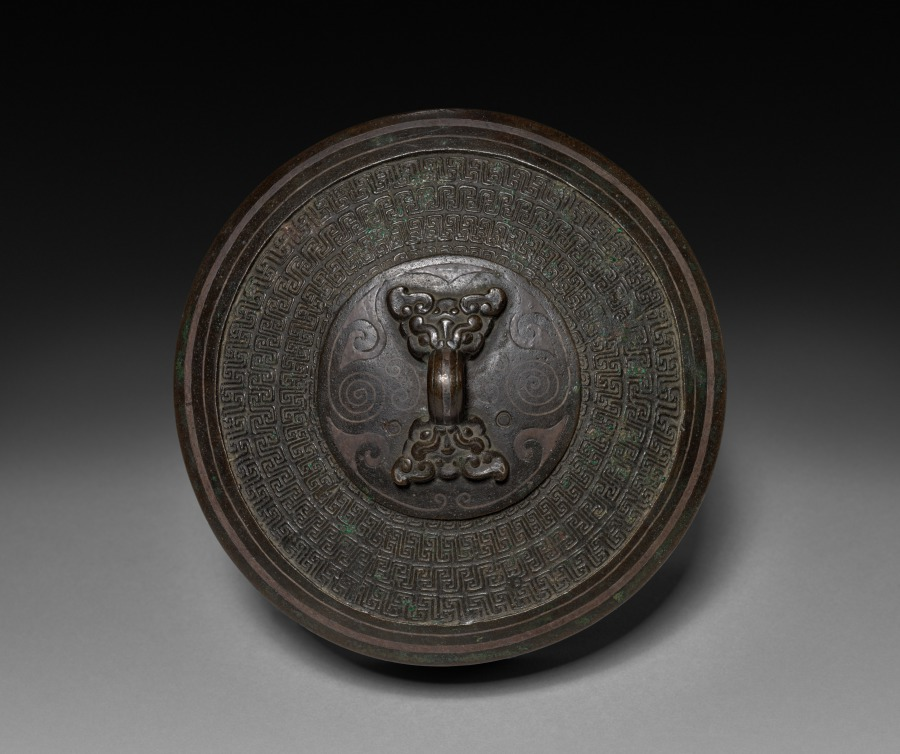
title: Kettle with Handle (lid)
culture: China, Qing dynasty (1644-1911) or Republican period (1912-49)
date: 1700s-1800s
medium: bronze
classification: Metalwork